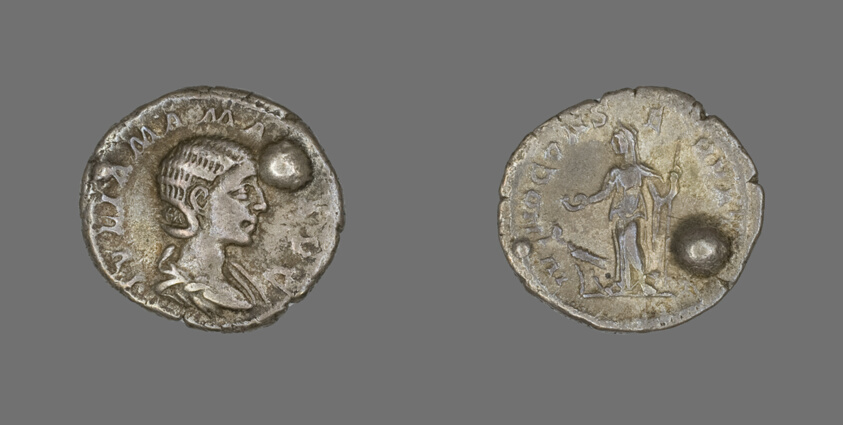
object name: Coin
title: Denarius (Coin) Portraying Julia Mamaea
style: roman (ancient, style or period), ancient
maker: Roman, minted in Antioch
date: 222-235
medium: Silver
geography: Roman Empire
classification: coin; ancient art